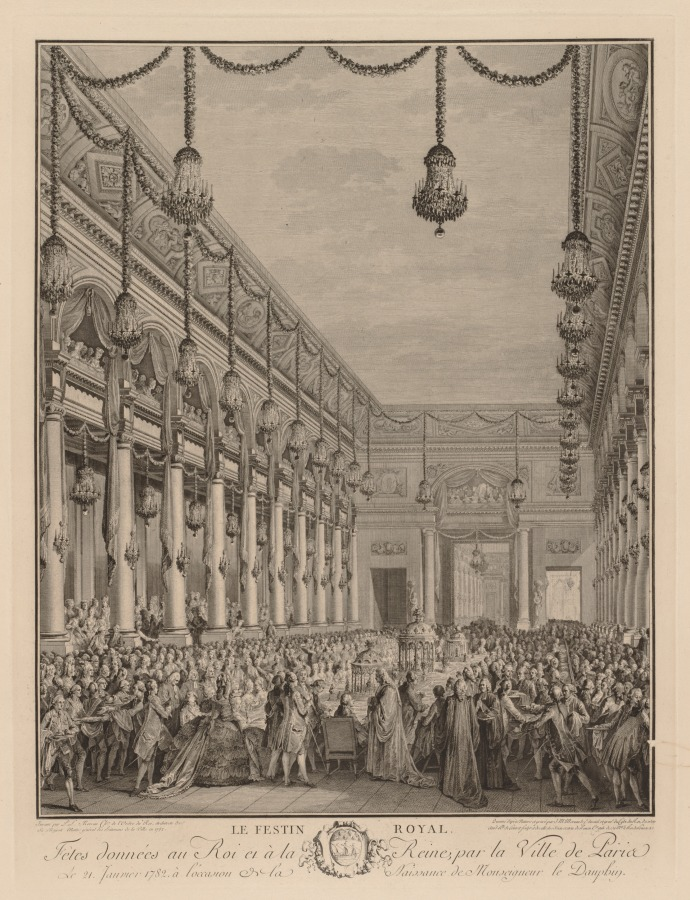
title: Royal Feast at the Hôtel de Ville, January 21, 1782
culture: France, 18th century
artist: Jean-Michel the Younger Moreau (French, 1741–1814)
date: 1782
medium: engraving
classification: Print